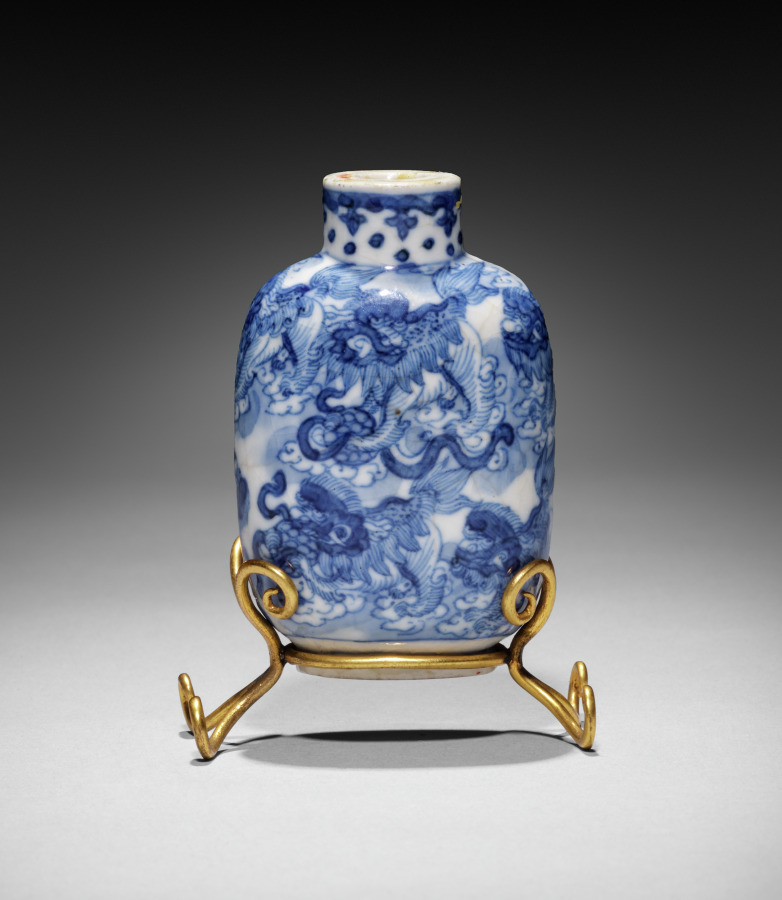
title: Flattened Ovoid Snuff Bottle with Stopper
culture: China, Jiangxi province, Jingdezhen kilns, Ming dynasty (1368-1644), Wanli reign (1572-1620)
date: 1573–1620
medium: porcelain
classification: Ceramic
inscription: 萬曆年製